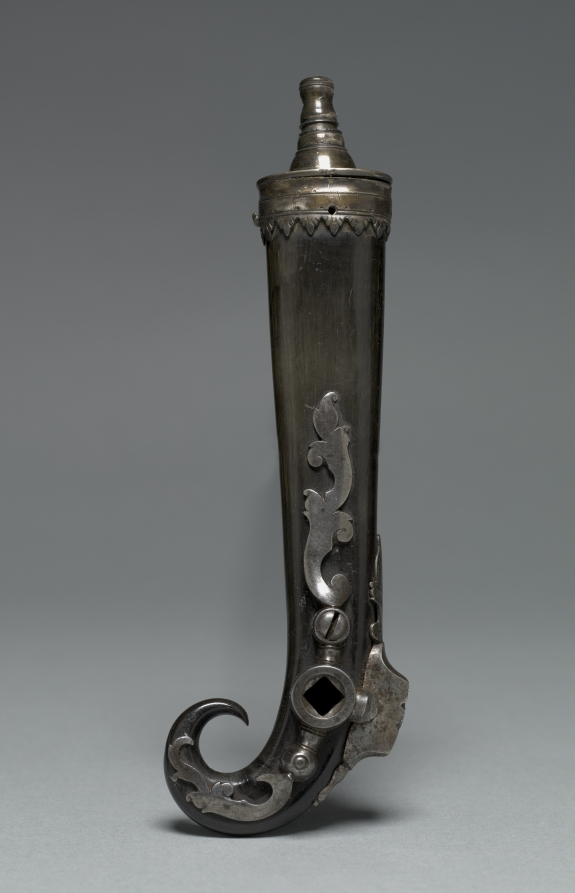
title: Combined Priming Flask and Wheel-Lock Spanner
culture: Germany or Austria, first half of 17th Century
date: c. 1600–1650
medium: horn with brass and steel mounts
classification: Arms and Armor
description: Early firearms required many tools and accessories for their proper use and maintenance. This clever design fulfilled a dual purpose as a spanner and priming flask. Small containers like this one would hold fine-grain gunpowder used to set off (or prime) the main charge in the barrel. A spanner would be used to operate a wheel-lock mechanism that enabled a gun to fire. On the gun, the jaws of the lock clamped a piece of flint or pyrites designed to rub against the rough edge of the wheel projecting into the pan. The wheel was revolved by a tightly coiled spring wound by the spanner and released when the gun's trigger was pulled causing sparks to ignite the gunpowder in the breech.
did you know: Many accessories that were used in hunting were made of the very animals that were to be hunted, this one here was made of horn.